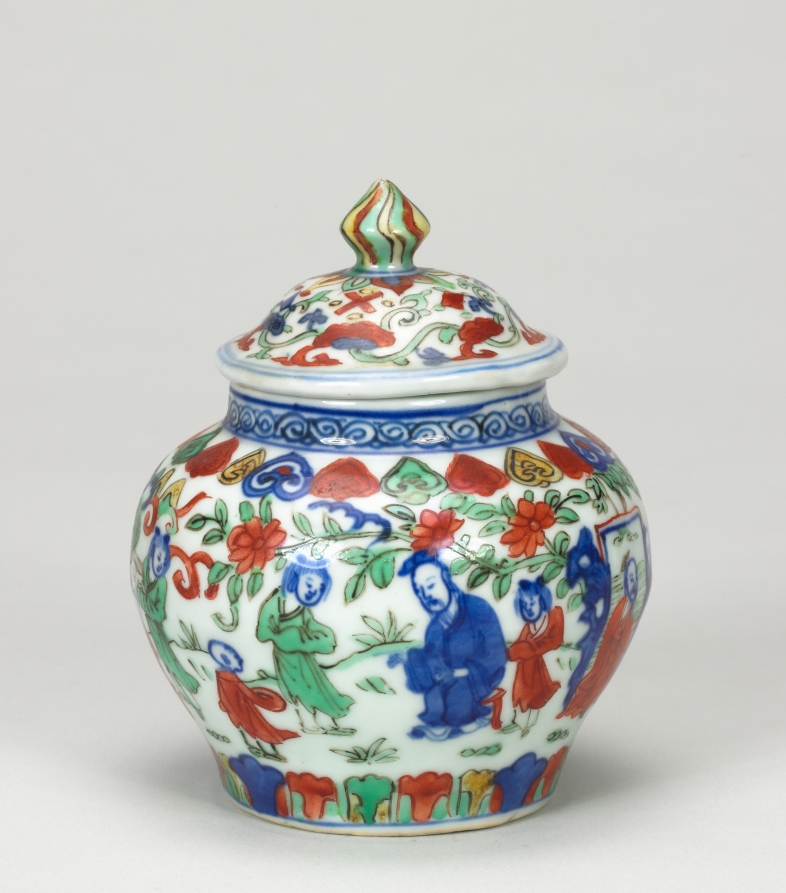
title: Covered Jar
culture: China, Jiangxi province, Jingdezhen kilns, Ming dynasty (1368-1644), Wanli reign (1573-1620)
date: 1573–1620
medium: porcelain with blue underglaze decoration and overglaze enamels in red, green, and yellow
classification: Ceramic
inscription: 大明萬曆年製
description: In the Ming (1368–1644) and Qing (1644–1911) dynasties, luxury items became more affordable to larger parts of the society, including women, merchants, and literati in non-official positions. Imperial patronage and a growing urban population encouraged consumption of luxury goods and local craftmanship. This covered porcelain jar has blue underglaze and overglaze in red, green and blue enamels. It shows Ming dynasty advancements in porcelain decoration and the creative mind of the talented artisans who made it.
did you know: This jar is painted with 16 figures of all ages enjoying a garden setting.